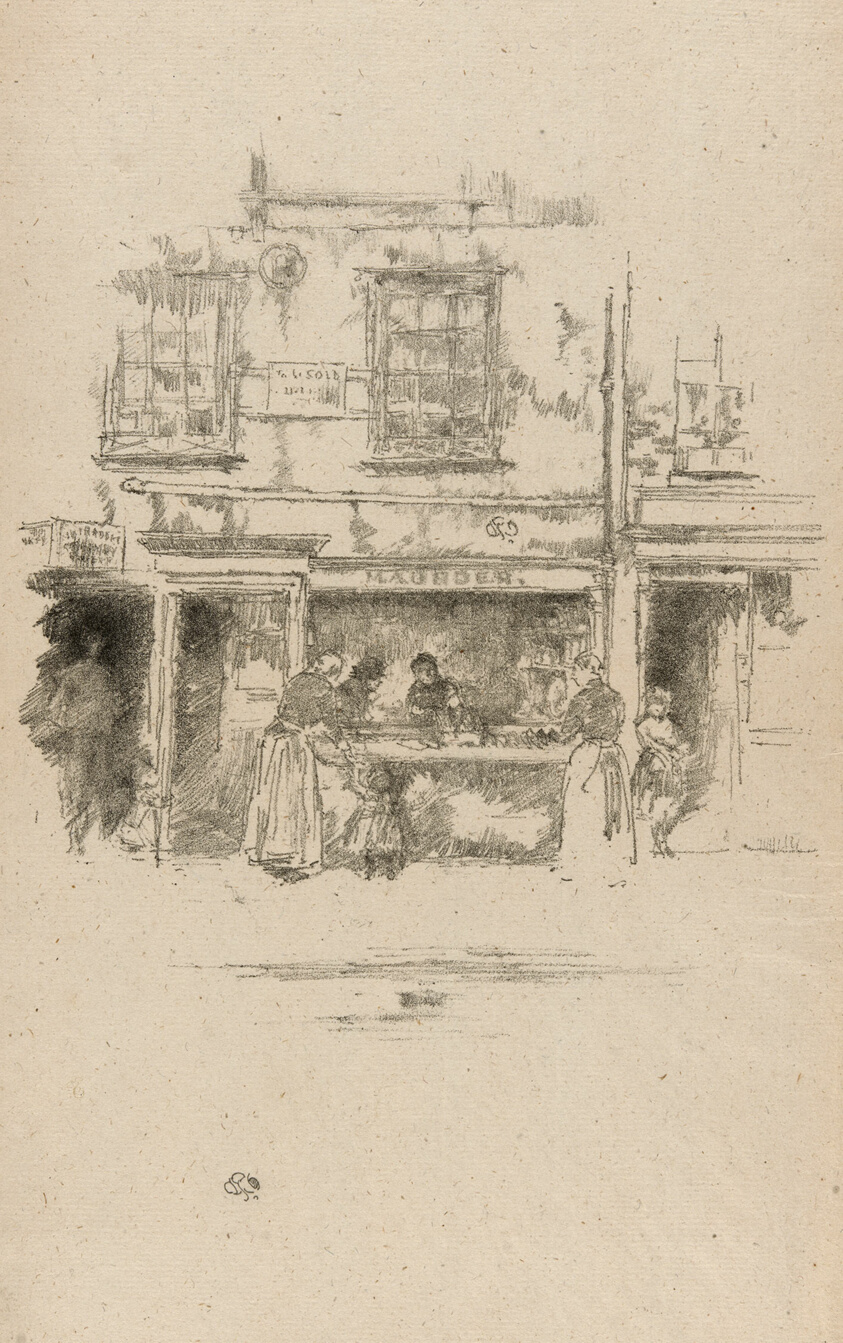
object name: Print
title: Maunder's Fish Shop, Chelsea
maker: James McNeill Whistler (American, 1834-1903)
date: 1890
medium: Transfer lithograph in black on cream laid paper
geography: United States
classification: transfer lithograph; lithograph; print; prints and drawing; paper